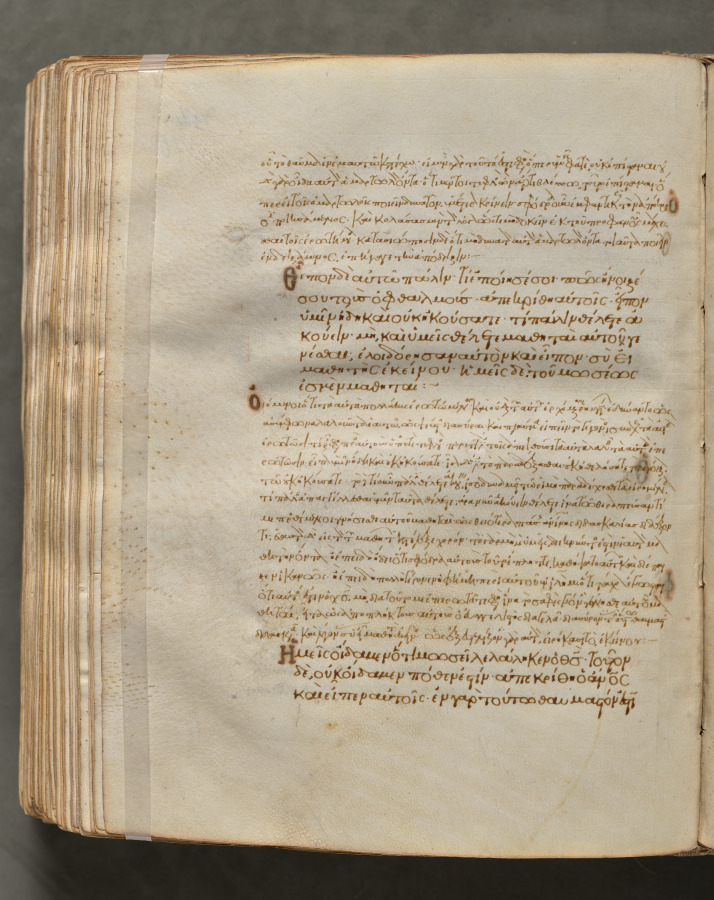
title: Text, folio 370 (verso), from a Gospel Book with Commentaries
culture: Byzantium, Constantinople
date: c. 1000–1100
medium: ink, tempera, and gold on vellum; leather binding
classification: Bound Volume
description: Each of the four gospels in this book opens on a page with brilliantly illuminated borders depicting the author of the text as well as birds—principally peacocks, symbols of the immortality of the soul—and fountains, representing the fountain of life and the salvation of the soul. This volume consists of 428 leaves with texts in Greek. Its level of sophistication suggests that it was probably written and decorated in a monastery in Constantinople.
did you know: Gospel books were carried in procession through Byzantine churches.